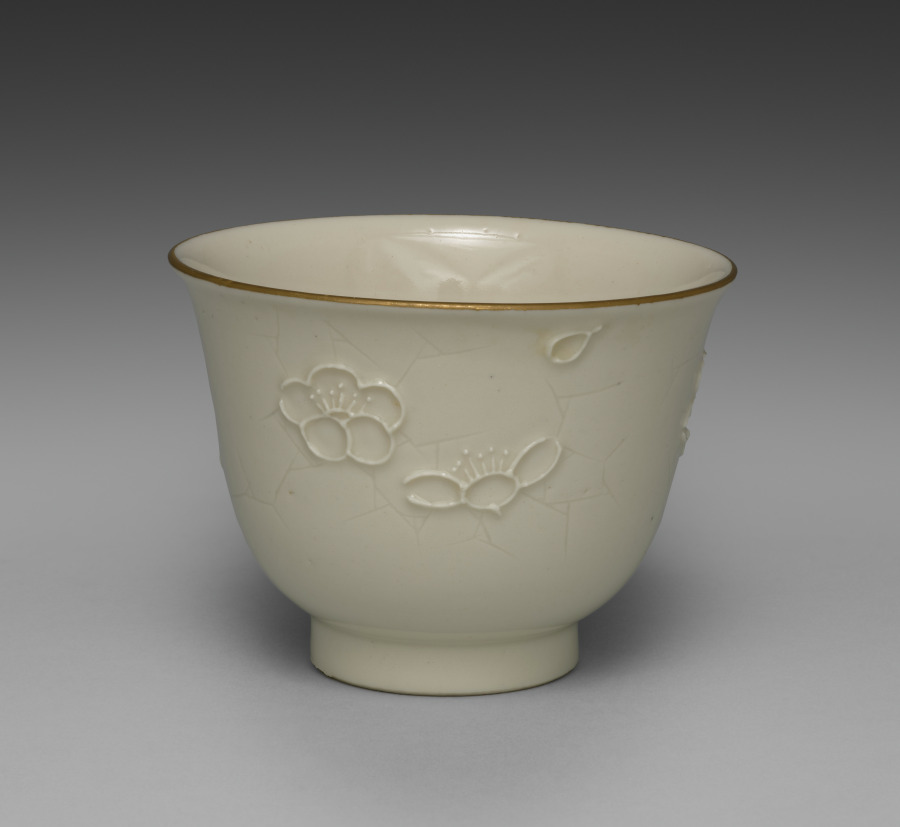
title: Drinking Cup from Dining Set with Plum Blossoms and Cracked-Ice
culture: Japan, Meiji period (1868–1912)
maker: Seifū Yohei II (Japanese, 1844–1878)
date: c. 1875–78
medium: Porcelain with molded designs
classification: Ceramic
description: Each item in this set has a delicate low-relief design of flowering plum branches over scattered, intersecting lines meant to resemble the cracked-ice surface of a frozen body of water and is signed on the base in gold pigment. While Yohei II produced many fine works in underglaze blue, like those produced by Kiyomizu Shichibei, he also made works in quite different styles later in his career, from the early 1870 s. In 1873, he was appointed purveyor to the Industrial Center of Kyoto Prefecture, a designation associated with Kyoto’s efforts to reach an international market through the port of Kobe; and from 1875 until his death, he was involved in national-level projects to present Japanese ceramics across the world. It was during this period that Yohei III was apprenticed to Yohei II, and it has been suggested that this set may in fact be an early example of Yohei III’s work, which he signed with his teacher’s name. Decorated with flowers resembling Japanese textile motifs, the set calls to mind the design of Yohei II’s pair of vases with plum blossoms in the Victoria and Albert Museum. Here, the elaborate trees created for a formal public exhibition setting have been translated into the approachable blossoms of the genteel domestic environment. While the designs are consistent across the pieces, each raised flower petal and pistil and each incised line in the ice was done by hand, so the cups, bowls, and dishes are similar yet unique. The bottoms of two boxes once identified the set’s owner, but the information has been deliberately obscured with black ink. However, inscriptions still visible appear to indicate two occasions, once at the end of July 1886 , and once again in June 1916 , when parts of the set were requested from Hokura in Niigata Prefecture. The location corresponds to a neighborhood in the present-day city of Jōetsu. The surname Tsuji 辻 also appears on a paper tag affixed to one of the box cloths. Future research may possibly reveal more about their provenance. A vase by Yohei III in a private collection combines the formal grandeur of the Yohei II vases in the Victoria and Albert Museum with the gentler design of this dining set, placing flowering plum trees against soft, scalloped-edge clouds resembling those in golden screens.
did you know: The dining wares have a creamy white coloration that the four boxes containing them identify as Korean in style.